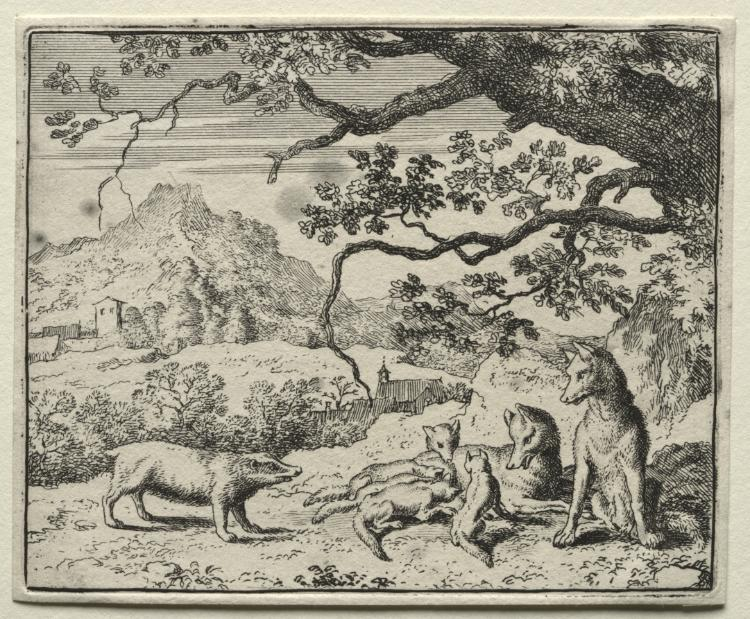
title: Reynard the Fox: The Badger Calls Reynard to Court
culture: Netherlands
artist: Allart van Everdingen (Dutch, 1621–1675)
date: 1650–75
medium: etching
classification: Print